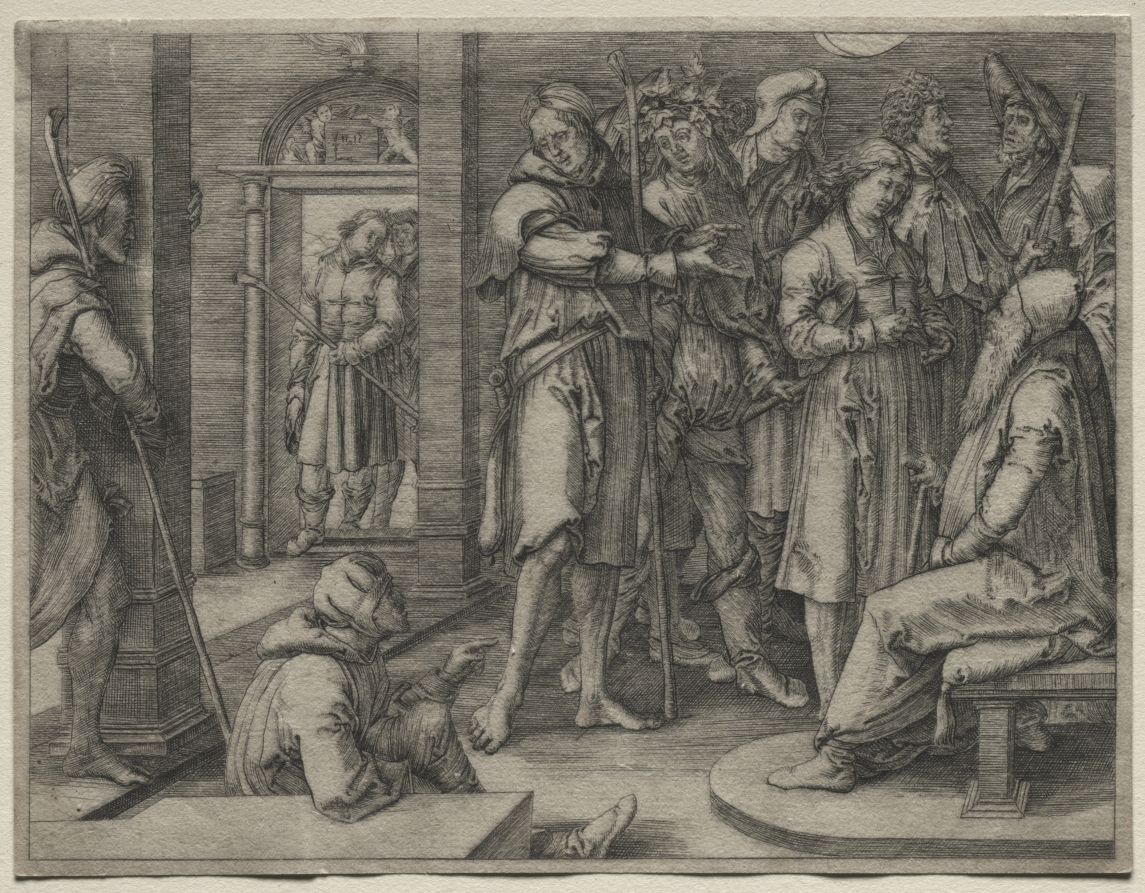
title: The Story of Joseph: Joseph Interprets his Dream to Jacob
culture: Netherlands, 16th century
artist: copy after Lucas van Leyden (Netherlandish, 1494–about 1533)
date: 1512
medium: engraving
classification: Print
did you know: Lucas van Leyden was both commercially successful and well respected in his own lifetime. Copies of his most popular prints were sold for decades after his death.